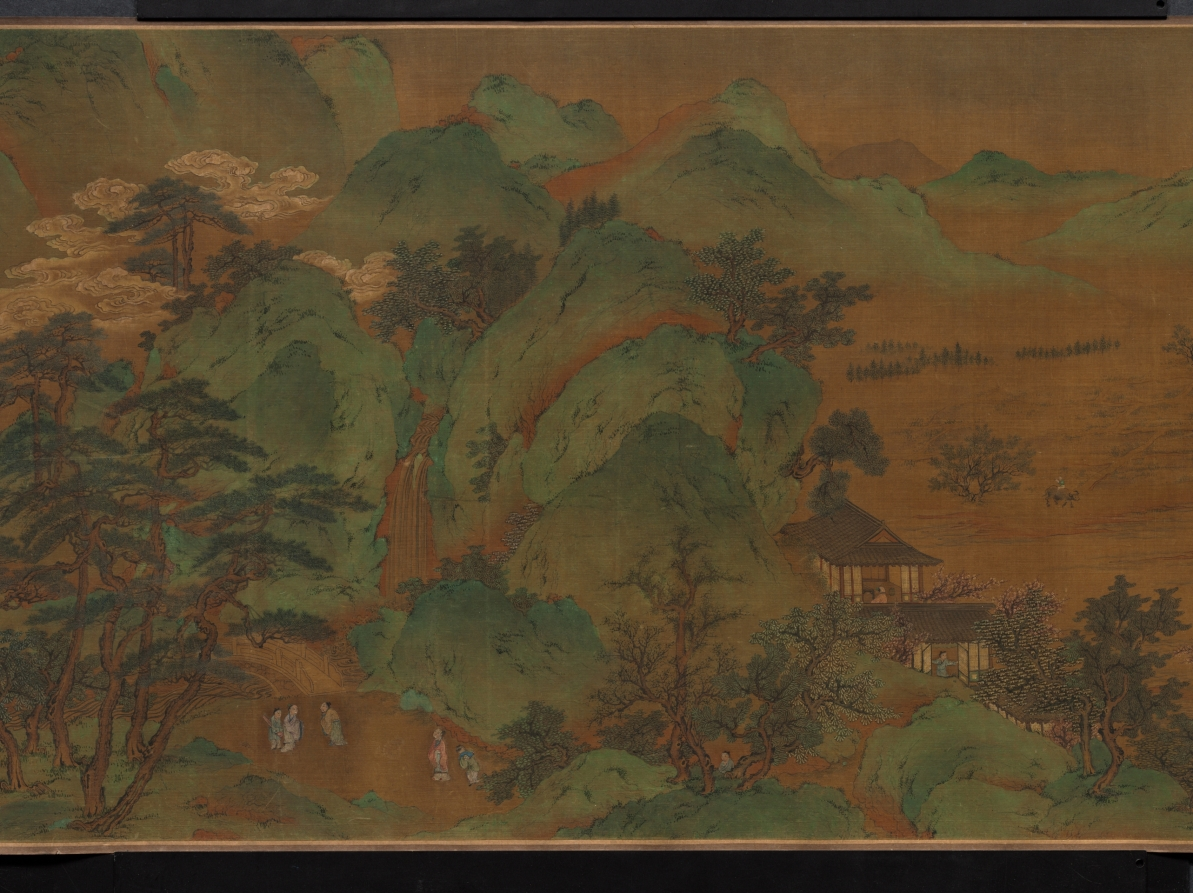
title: Landscape, The Palace of the Clouds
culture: China, Qing dynasty (1644-1911)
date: 1644–1911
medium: handscroll, ink on silk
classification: Painting